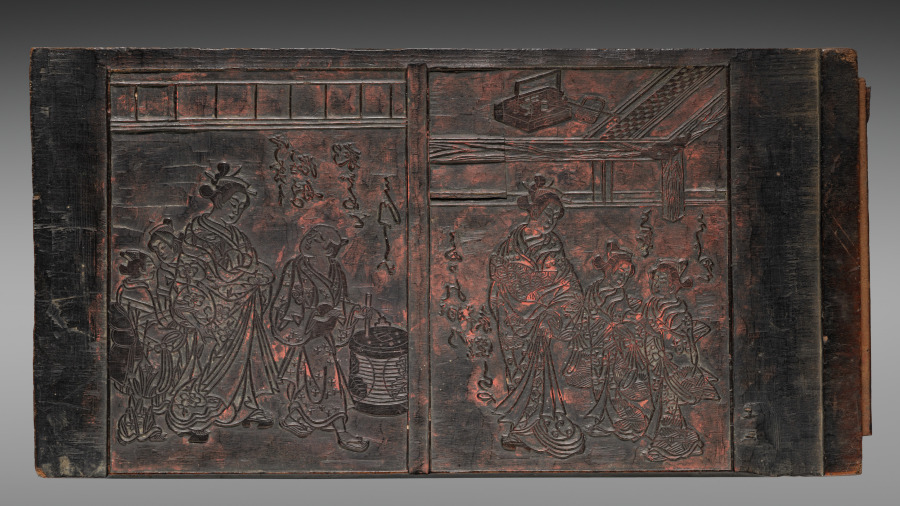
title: Print Block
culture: Japan, Edo period (1615–1868)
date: 1700s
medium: woodblock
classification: Woodblock